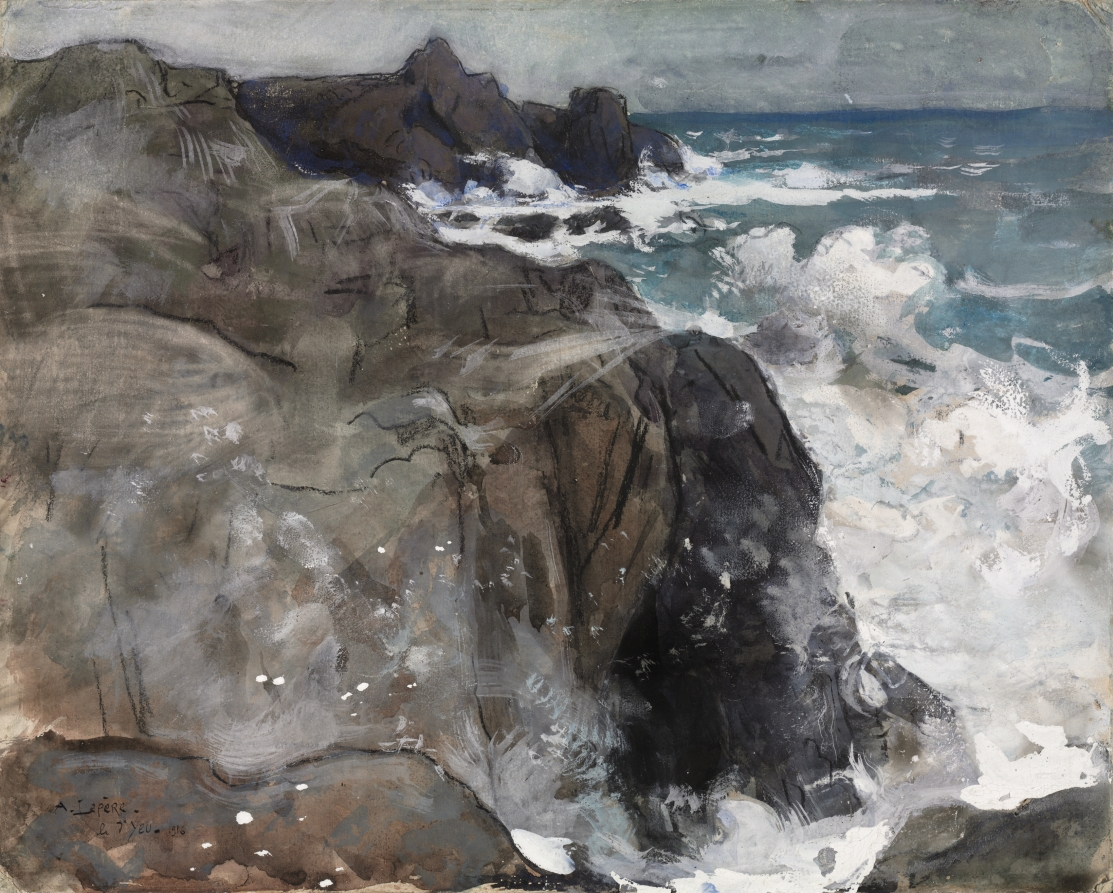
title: Storm on the Island of Yeu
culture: France, 20th century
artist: Auguste Louis Lepère (French, 1849–1918)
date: 1916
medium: watercolor and gouache over black crayon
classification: Drawing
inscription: signed, lower left, in black ink: A. Lepére - / [i]le d'Yeu - 1916 ; VERSO, [by artist?], center, in black chalk: Tempête à l'Ile d'Yeu ; lower left, in graphite: B5201 ; lower right, in graphite: FCX-